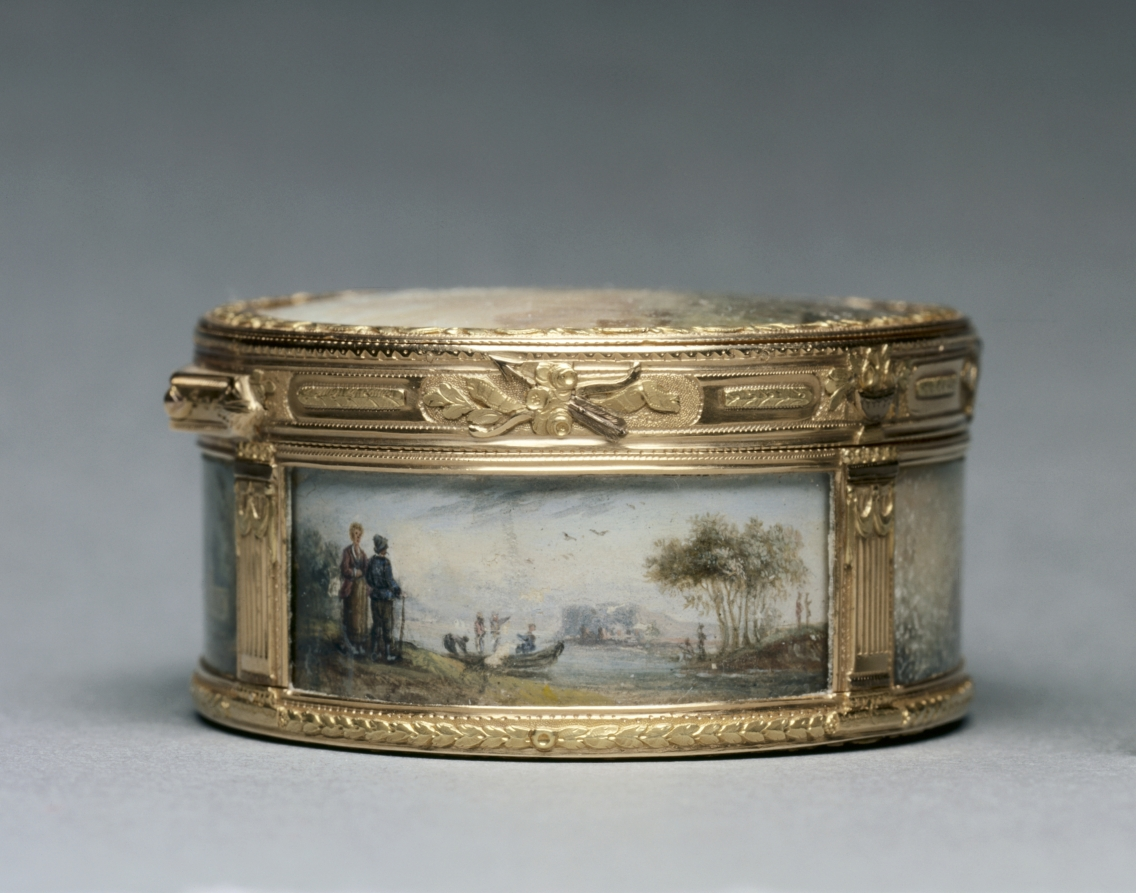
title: Snuff Box (Tabatière)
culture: France, 18th century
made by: Pierre-Nicholas Pleyard (French)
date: 1768–69; 1776–78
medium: gouache miniatures mounted on gold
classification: Metalwork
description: Snuff boxes were highly ornamented functional objects popular among French social elites. They were simultaneously containers for powdered tobacco and a means to communicate social and political status. Often decorated with miniature paintings inspired by popular paintings of the time, the works reproduced on this box are modeled after those of Claude-Joseph Vernet (cover and front panel) and David Teniers the Younger (base, side, and back panels).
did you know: These miniature paintings are mounted à cage, a practice popular in the mid-1700s that involved setting decorated panels into gold frames to create a box’s walls.